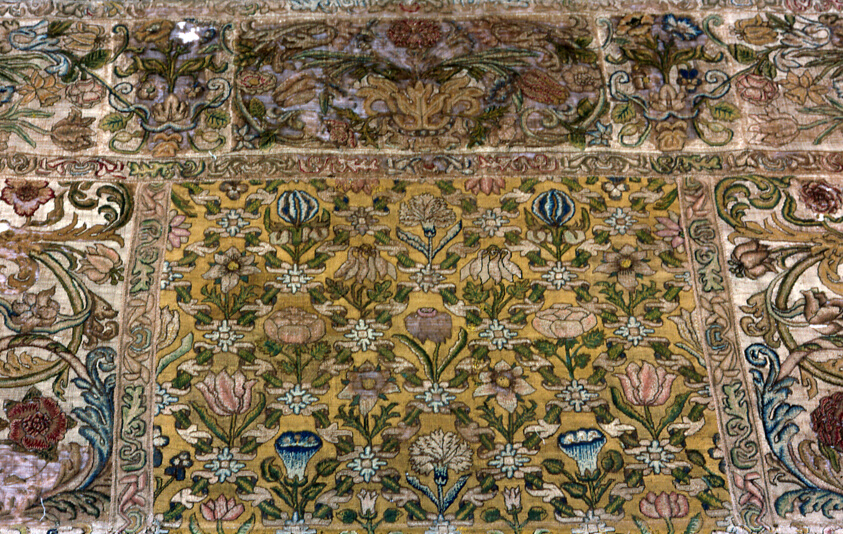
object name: Textile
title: Panel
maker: France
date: 17th/18th century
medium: Linen, plain weave; embroidered with silk floss in tent stitch and French knots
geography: France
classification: textile; needlework (visual works)